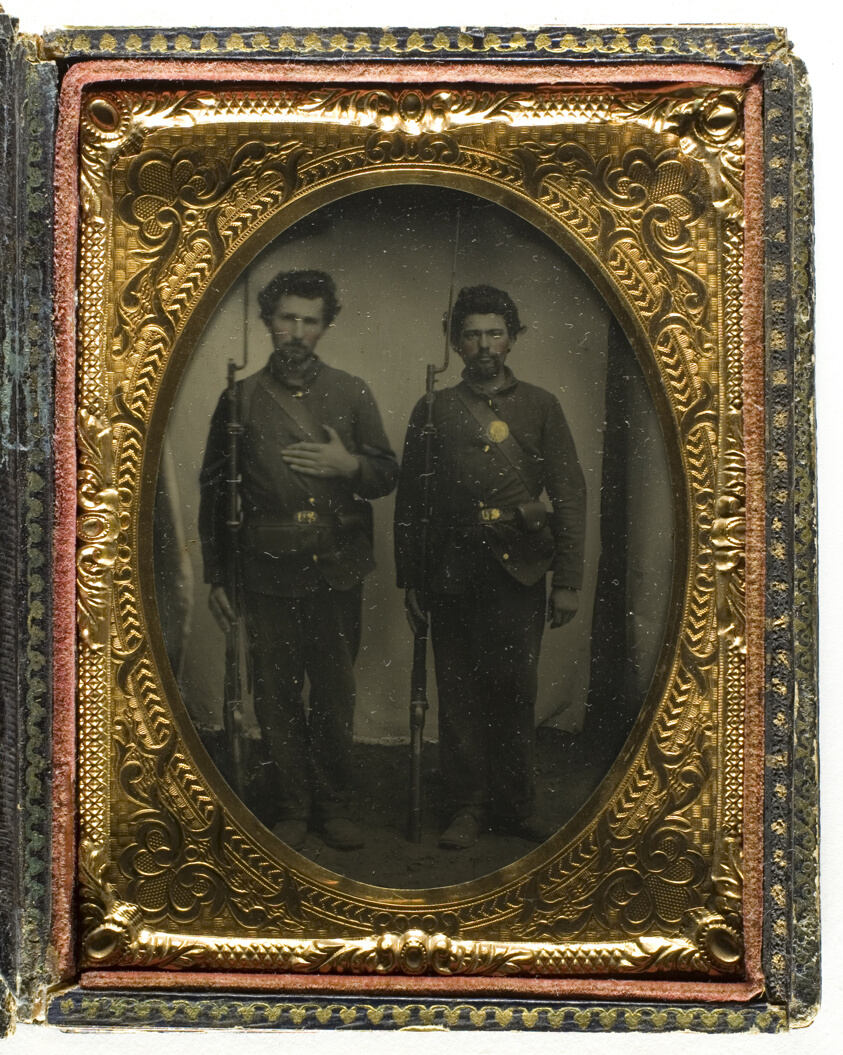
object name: Photograph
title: Unitlted (Two Soldiers)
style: 19th century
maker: Artist unknown; 19th century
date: 1855/99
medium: Tintype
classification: photography; tintype; photographic process; photograph